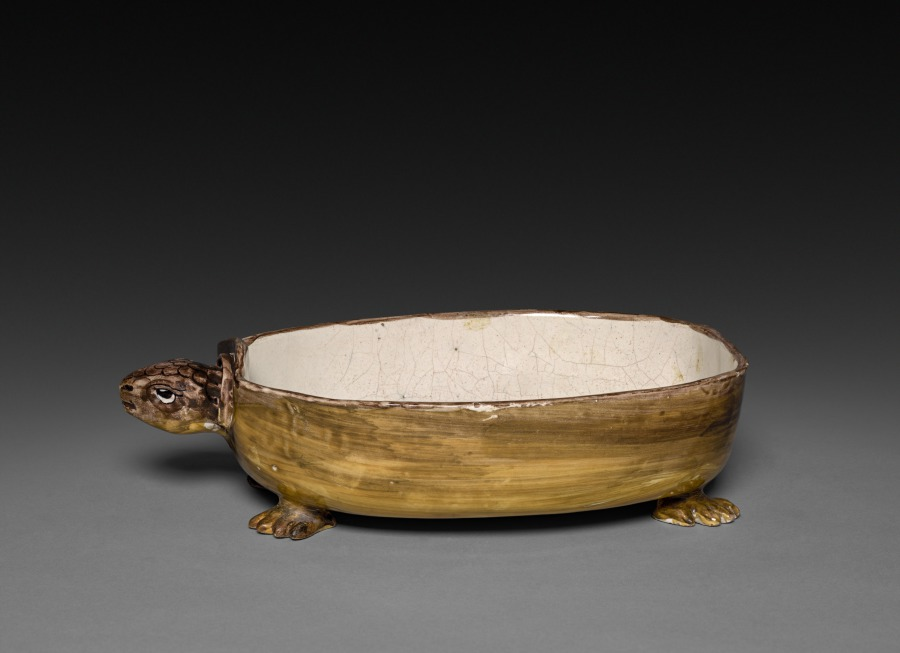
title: Tureen in the Form of a Turtle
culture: France, mid 18th century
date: c. 1745–65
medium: faience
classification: Ceramic